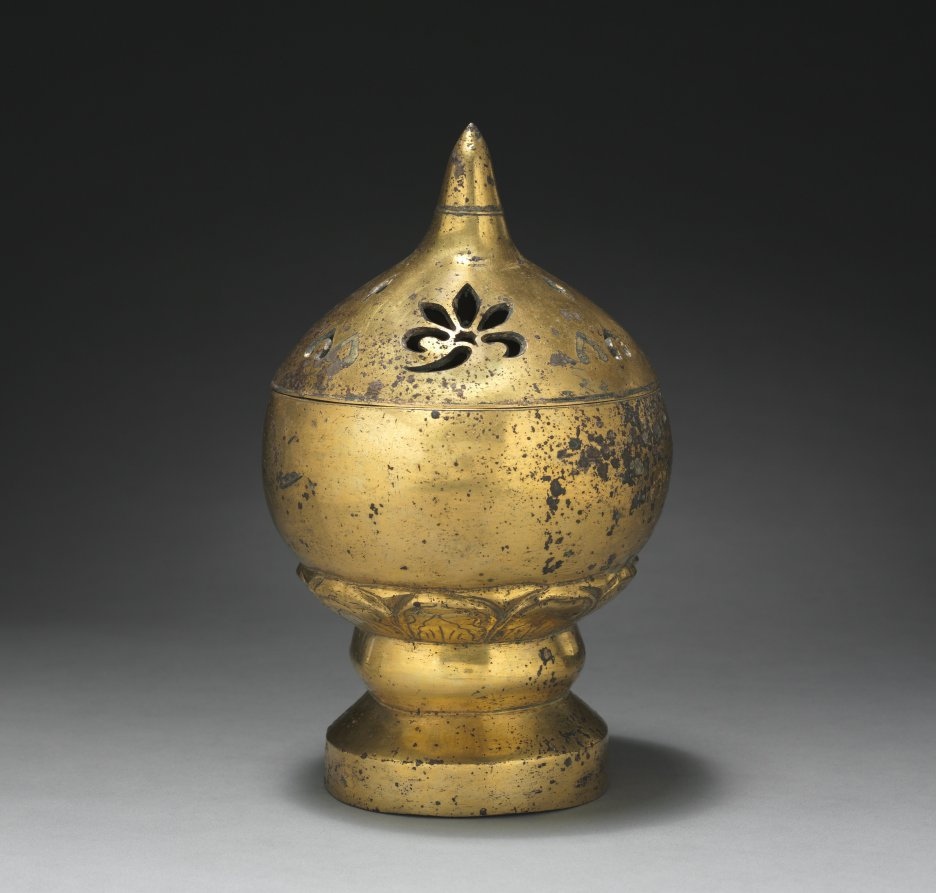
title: Censer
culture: China, Tang dynasty (618–907)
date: early 600s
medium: gilt bronze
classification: Metalwork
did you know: The censor's base has a band of incised lotus-petal motifs, while the pointed lid has openwork floral motifs to release the incense's aroma.